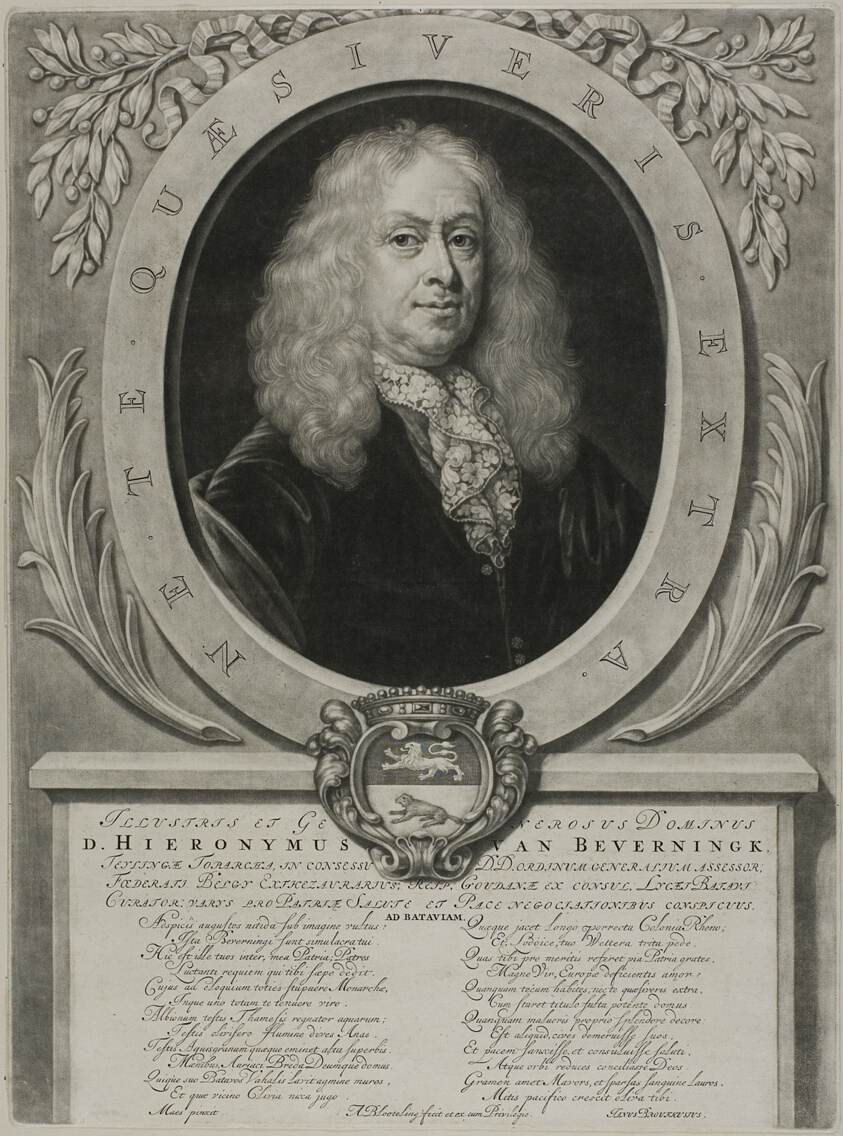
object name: Print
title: Portrait of D. Hieronymous van Beverningk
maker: Abraham Blooteling (Dutch, 1640-1690); after Everard Quirijnsz. van der Maes (Dutch, 1577-1656)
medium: Mezzotint and engraving on paper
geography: Netherlands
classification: mezzotint; print; prints and drawing